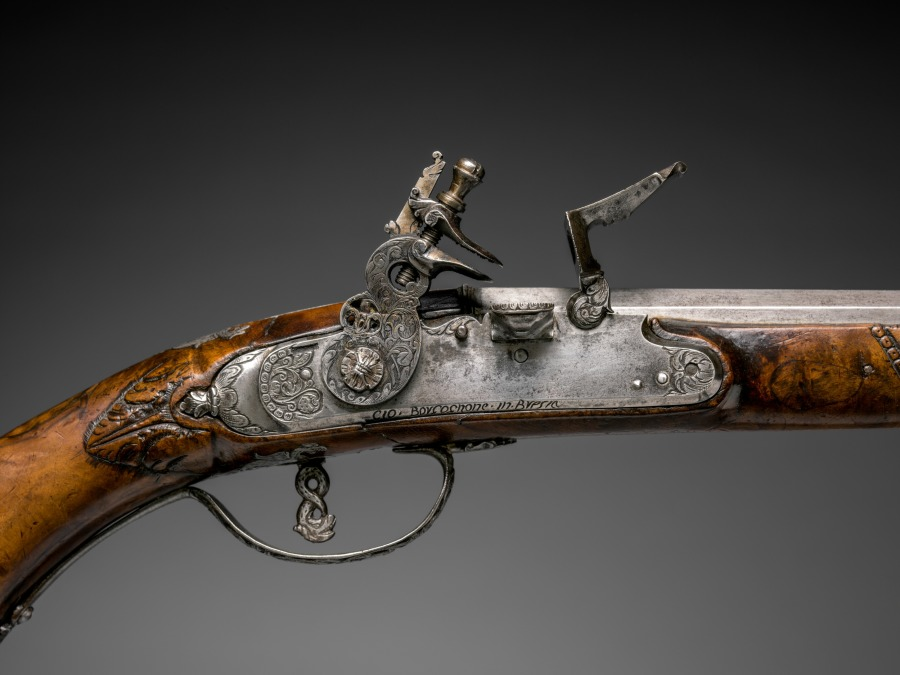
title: Flintlock Pistol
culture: Italy, Brescia, late 17th century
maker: Gio Borgognone (Italian)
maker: Lazarino Cominazzo (Italian)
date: c. 1690–1700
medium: steel, chiseled steel with walnut stock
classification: Arms and Armor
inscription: barrel signed: Lazarino Cominazzo; lockplates signed: Gio Borgognone in Bresia